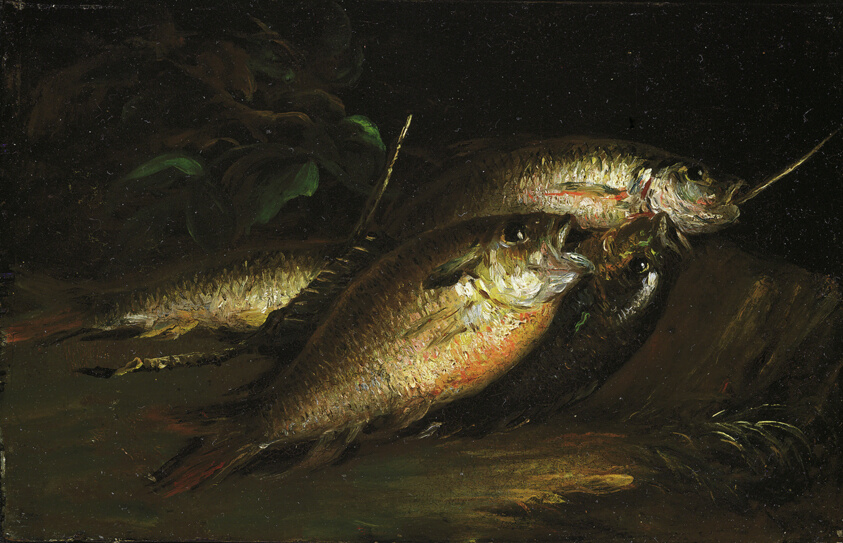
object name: Painting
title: Fish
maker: Shepard Alonzo Mount (American, 1804–1868)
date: 1842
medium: Oil on panel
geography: United States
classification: painting; american arts